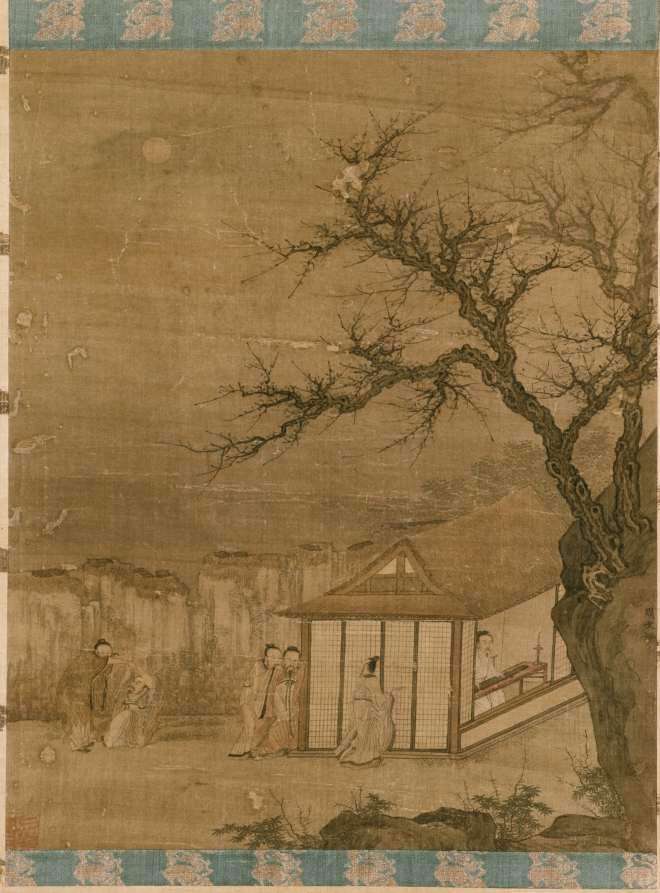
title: Listening to the Qin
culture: China, Ming dynasty (1368–1644)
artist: attributed to Tang Yin (Chinese, 1470–1523)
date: late 1400s–early 1500s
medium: hanging scroll; ink and light color on silk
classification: Painting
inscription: Artist's seal at lower left corner: Wu [remainder cut off].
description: The painting alludes to a legendary incident from the life of Ji Kang 嵇康 (AD 223–262), a guqin player who belonged to a group of 3rd-century eccentric intellectuals. Ji Kang is known as the author of a Guangling San (廣陵散; Melody from Guangling), a composition for the guqin so haunting that it aroused spirits to visit him. The painting depicts the moment when one of the spirits––disguised as a human––is helped by another to emerge from the ground, while others are drawn to the musician playing in his cottage under the full moon.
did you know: The painting is mounted in a Japanese-style three-tier format with futai.